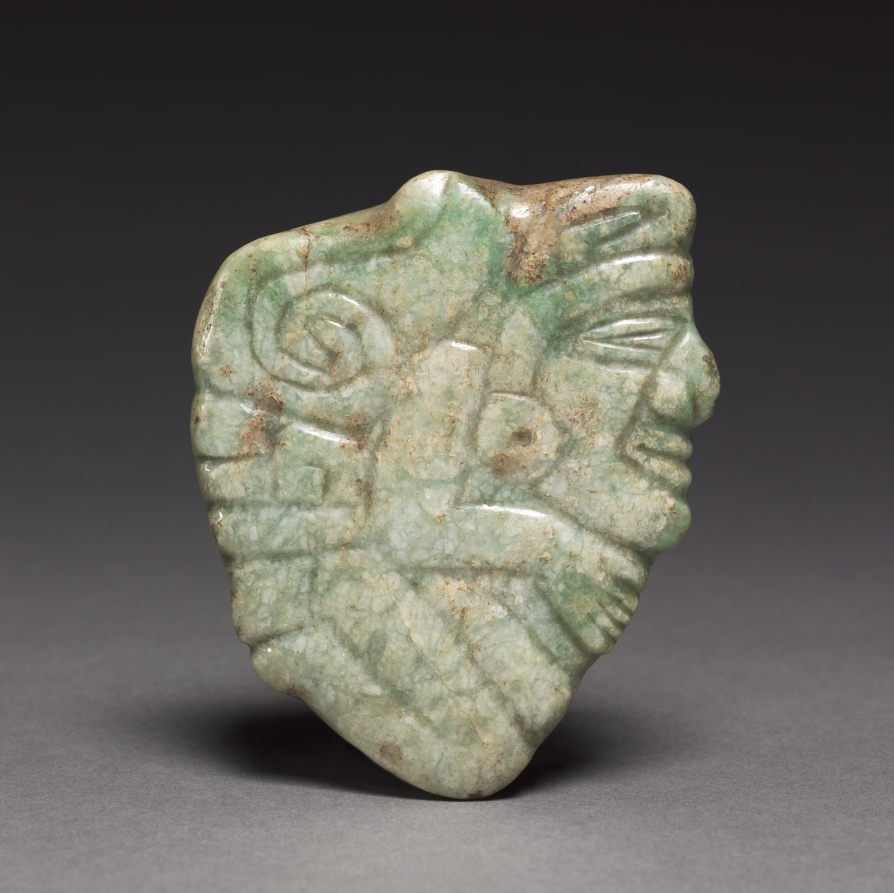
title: Deity Plaque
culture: Mexico or Central America, Maya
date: c. 300–600 CE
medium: jade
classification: Jade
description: Depicted as an elderly man with a conch shell on his back, this plaque probably portrays God N, the deity who supports the sky.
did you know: In ancient Mesoamerica, jade was more valuable than gold.